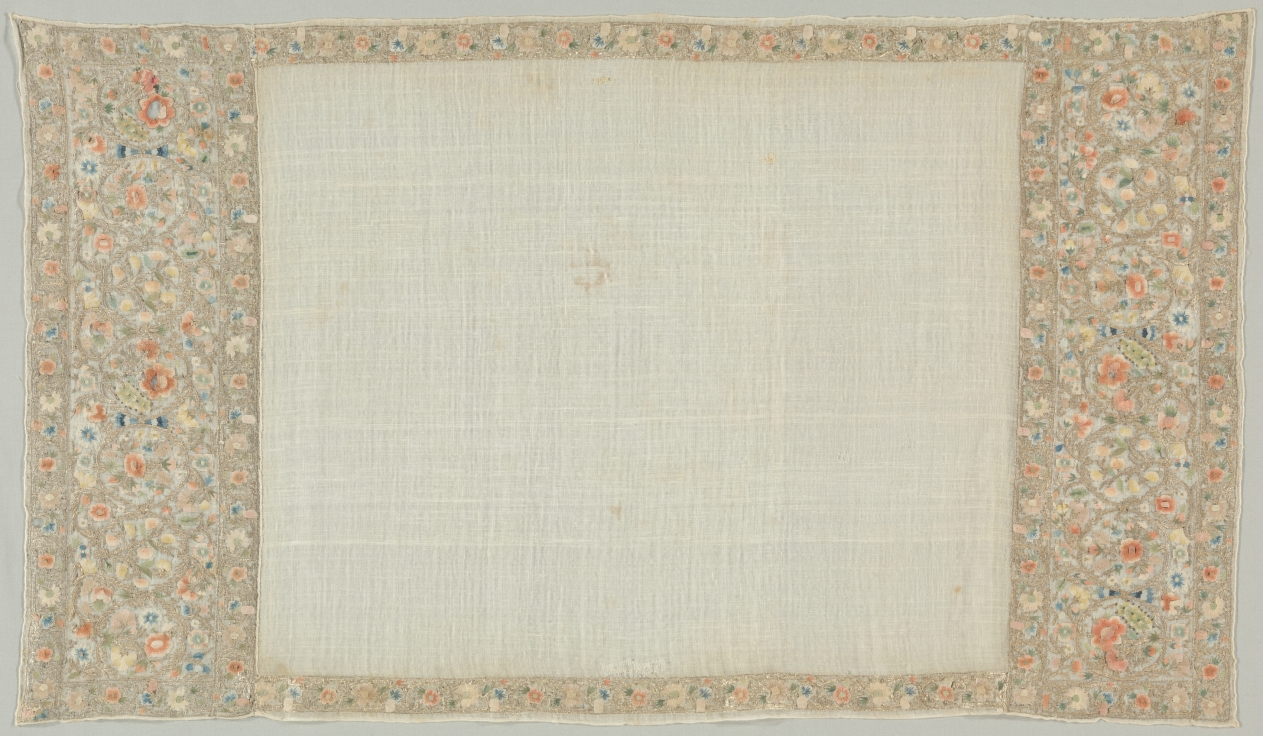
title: Embroidered Towel (Peshkir)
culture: Turkey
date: 1700s–1800s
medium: embroidery: silk and metal on cotton tabby ground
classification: Embroidery